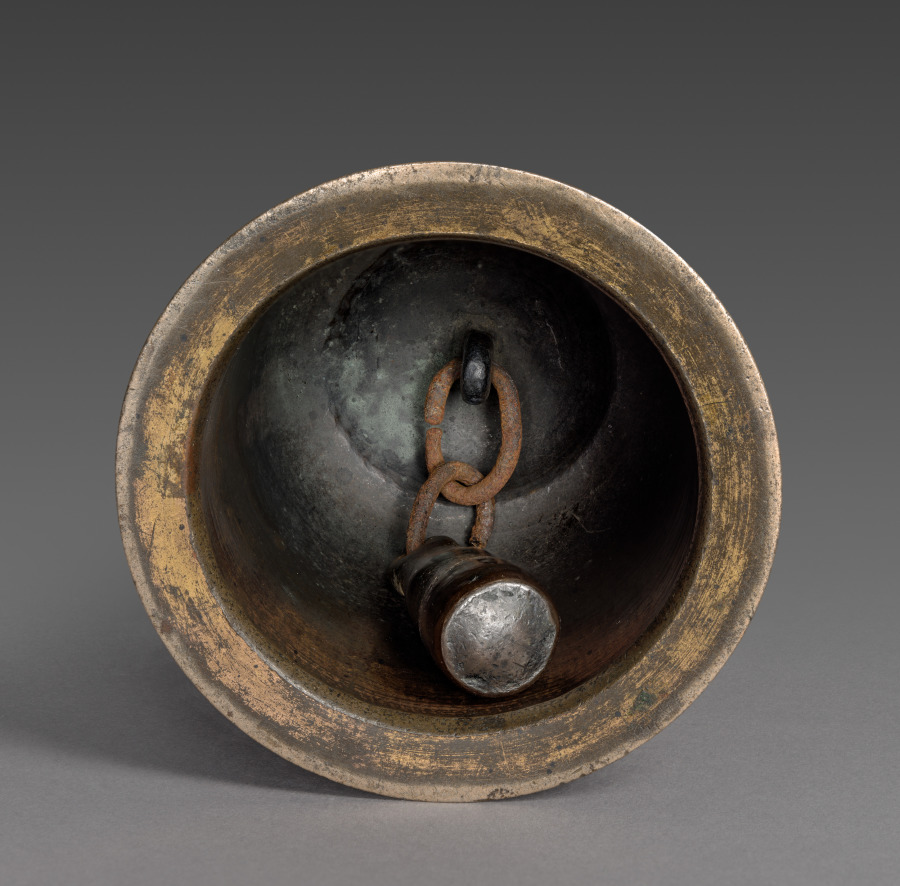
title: Five-pronged Vajra Bell (Gokorei)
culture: Japan, Kamakura period (1185–1333)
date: early 1300s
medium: gilt bronze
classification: Metalwork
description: The five prongs of this bell symbolize the Buddhist “Five Perfections”—generosity, morality, patience, perseverance, and concentration. The mouth of the bell symbolizes the “Sixth Perfection” of wisdom. The bell was used in Japanese Esoteric Buddhist rituals along with vajra pestles, or kongōsho.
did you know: Vajras are symbolic weapons, representing the properties of a diamond (indestructibility) and a thunderbolt (irresistible force), still used in Buddhist ceremonies today.